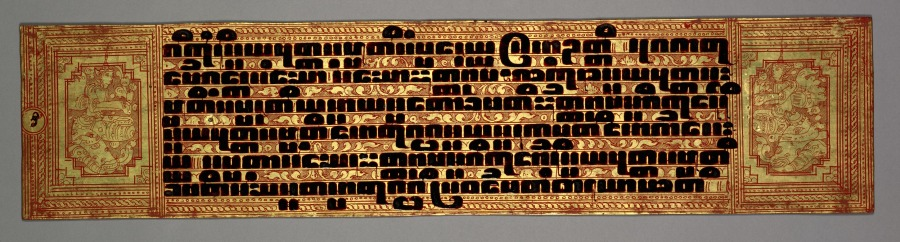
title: Kammavacha: Buddhist Ordination Text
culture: Myanmar (Burma)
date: 1800s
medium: Cover: lacquer, gilding, and glass appliqué on wood; leaves: lacquer and gilding on cloth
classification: Manuscript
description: In premodern Burma, lay people commissioned lavishly ornamented manuscripts for ceremonial occasions, when officiants would read aloud from the text. Written in black lacquer, the text is in the language of Pali written in a Burmese script. It contains ordination rites and procedures for monastic ceremonies. The second to last page is covered with intricately drawn, winged celestial beings (nats) in gestures of praise. They fly amid intertwining vegetation—denoting bounty—that grows from serpentine forms that refer to rain clouds. Lionlike forms inhabit the space with them. The top and bottom covers are equally ornamented with jeweled floral patterning.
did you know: The Pali text of this manuscript is written in Burmese square script, which is also known as "tamarind seed script."